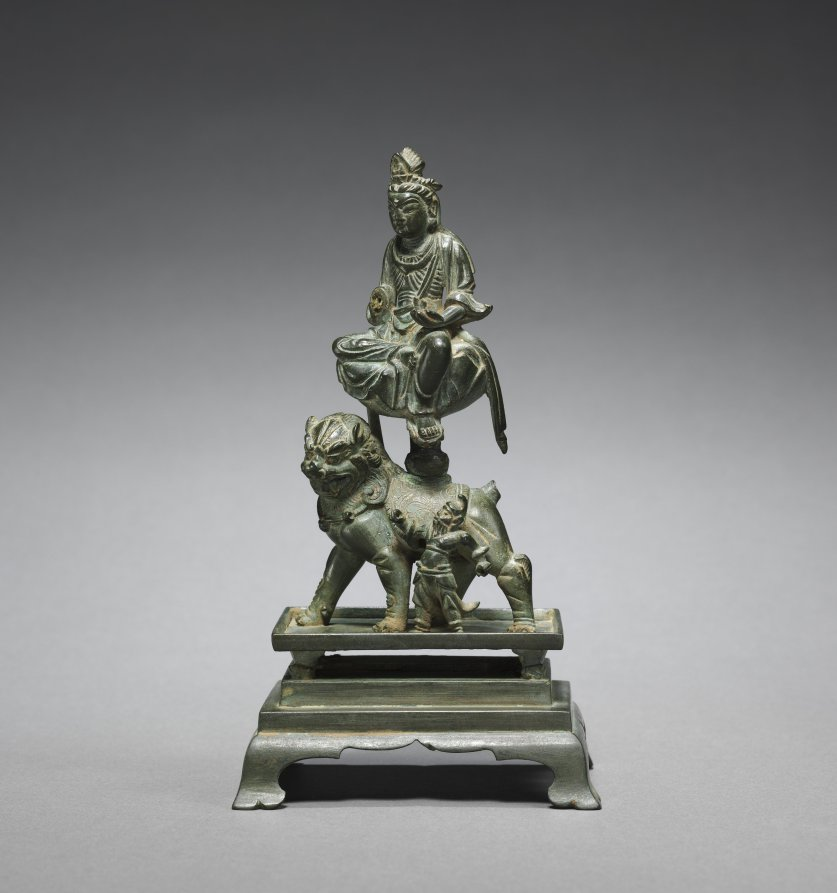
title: Manjusri Riding on a Lion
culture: China, Liao dynasty (916-1125)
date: 900s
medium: bronze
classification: Sculpture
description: The Bodhisattva of Wisdom, Manjusri, is seated on a lotus pedestal atop his vehicle, the lion. A bearded attendant stands beside the lion.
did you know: At one time, something was threaded through the harness of the lion and the hands of the attendant.